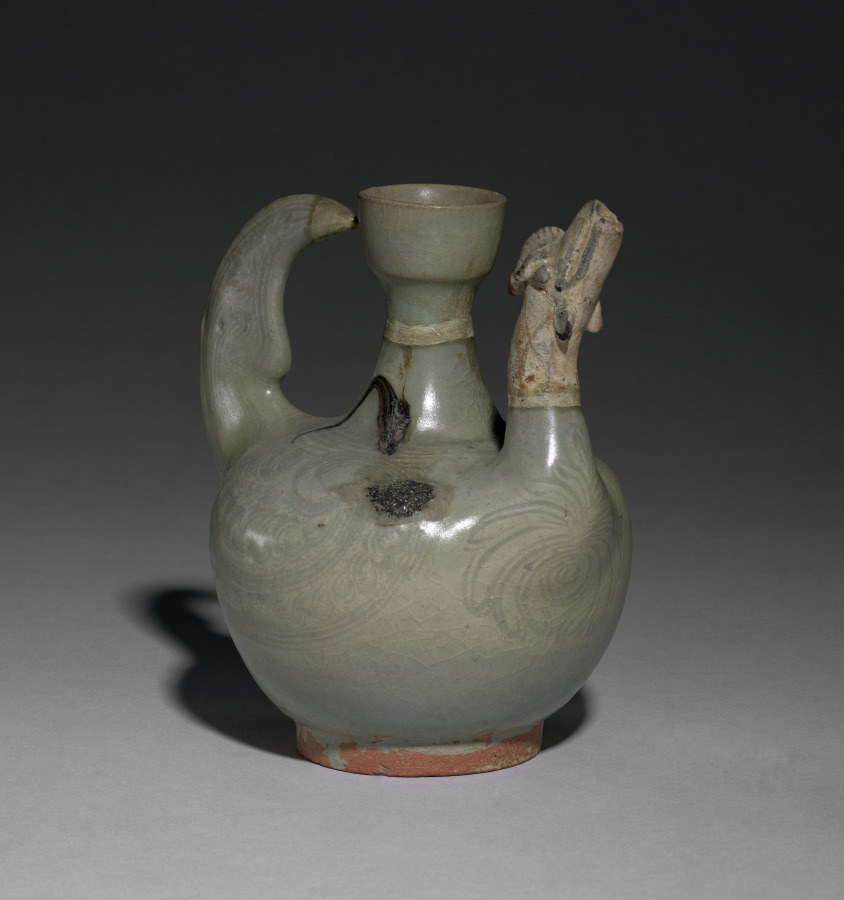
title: Pouring Vessel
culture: Siam, Sawankhalok ware, late 13th-14th Century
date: late 1200s-1300s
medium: stoneware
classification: Ceramic